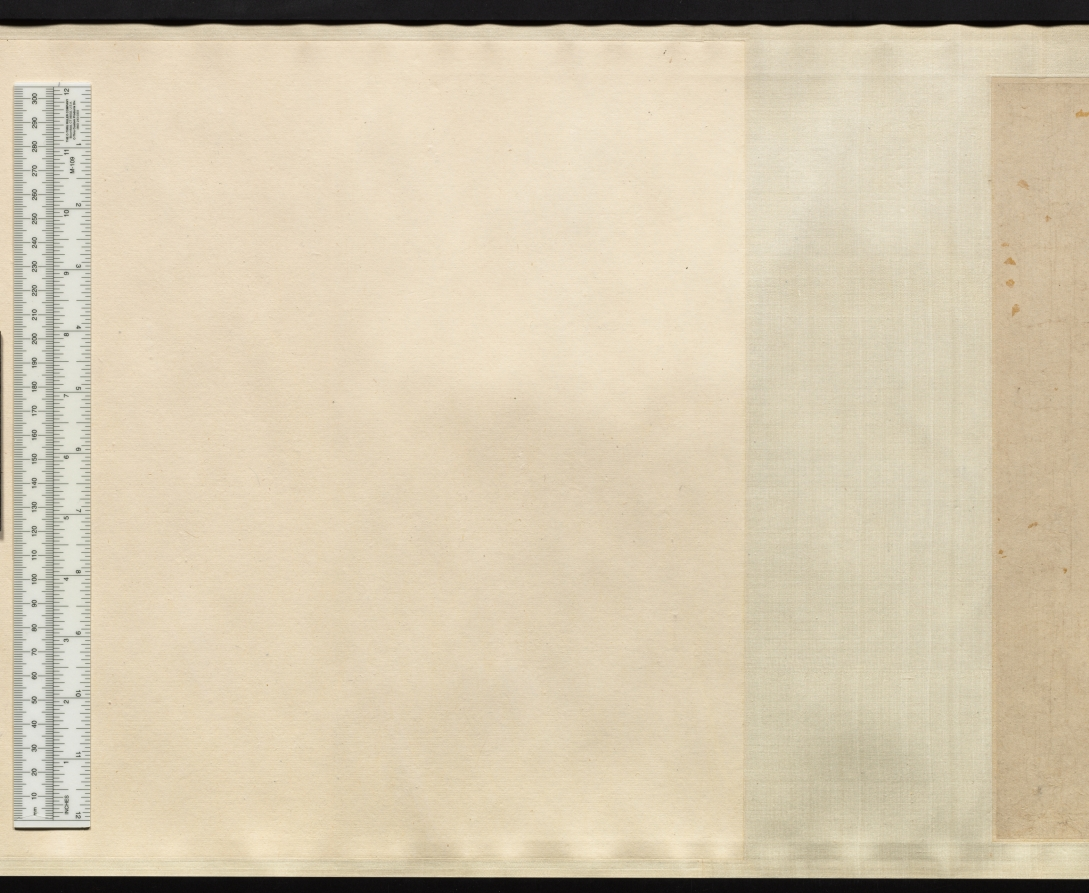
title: Beggars and Street Characters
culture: China, Ming dynasty (1368–1644)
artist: Zhou Chen (Chinese, c. 1450–c. 1536)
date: 1516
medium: Handscroll; ink and light color on paper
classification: Painting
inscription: 題: 周臣流氓圖. 古堇趙鶴琴 [印] 老鶴臨池; 鵝池軒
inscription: 正德丙子秋七月，閒窗無事 ，偶記素見市道丐者種種態度。乘筆硯之便，率爾圖寫。雖無足觀，亦可以助警勵世俗云。 東邨周臣記 [印]東邨; 舜卿; 鵝場散人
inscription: 吳中東邨周君，善丹青，尤長於人物。此圖其所見盛市丐者之狀種種，各盡其態，觀者絕倒。嗟乎，今之晝夜乞哀以求富貴者，安得起周君而貌之耶。臥雲徵君出示，余漫題其後。 甲子歲十月吳門黃姬水 [印] 士雅山人; 另一印不詳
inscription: 是冊凡數種。其飢寒流離疲癃殘疾之狀，種種之異。觀此而不惻然心傷者，非仁人也。計正德丙子逆瑾之流毒已數年。而[江]彬 [錢] 寧輩肆虐方熾。意分符剖竹諸君，亦鮮有能撫字其民者。然則舜卿此作，殆與鄭君 流民圖同意。其有補於治道者不淺，要不可以墨戲忽之也。 長洲張風翼題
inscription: 東村此筆，蓋圖寫飢寒乞丐之態，以警世俗耳。而質山 [黃姬水]欲其寫昏夜乞哀，而靈墟[張鳳翼]則擬之於安上門圖。二君之見，其各有所指哉。昔唐六如每見周筆，輒稱曰：周先生！蓋深服其神妙之不可及。若此冊者，信非他人可能而有符於六如之心伏矣。豈易得耶。若黃、張之指，則又論於畫之外，不在於形似筆墨之旨也。 萬歷丁丑十二月三日 茂苑文嘉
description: Zhou Chen from Suzhou provides rare depictions of impoverished people that once filled the city’s markets and streets. Despite Suzhou’s prosperity, its rapid growth polarized society, including the wealthy and those who had deserted their farmlands, who were without homes, unemployed, or sick. Amid these are figures who inspire fear rather than empathy. The painting may thus be informed by local practices at the end of the lunar year, in which street beggars, in exchange for food or money, would dress up like ghosts and demons to drive out evil forces.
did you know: Although Zhou Chen's original composition was an album of 24 figures, today it is mounted as two handscrolls, one in the Cleveland collection and one in the Honolulu Museum of Art.